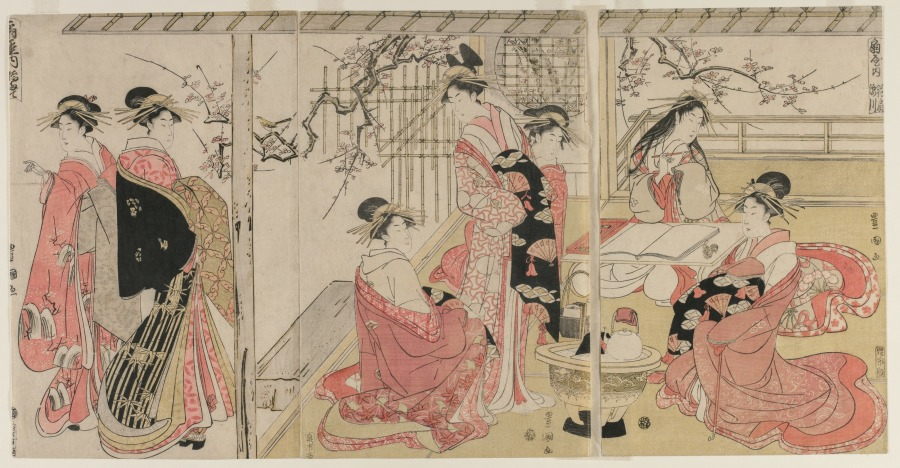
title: Courtesans of the Ōgiya on a Spring Outing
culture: Japan, Edo period (1615–1868)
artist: Utagawa Toyokuni (Japanese, 1769–1825)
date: mid- or late 1790s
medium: Triptych of woodblock prints, ink and color on paper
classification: Print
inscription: Signature: Toyokuni ga.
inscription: Publisher: Izumiya Ichibei (Senichi han). Censorship Seal: kiwame.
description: In these prints, two courtesans of the Ōgiya brothel are entering an open pavilion, while another group gathers around a Japanese hibachi inside. Hanaōgi, the most celebrated courtesan of Ōgiya in the late 1700s, is depicted at a desk. Holding a brush in her hand, she turns her head to one side as if gathering her thoughts before writing in the book before her. Both her position and her loosened hair separate Hanaōgi from her courtesan companions who wear elaborate coiffures. This depiction of her captures both her knowledge of poetry and her skill as a calligrapher.